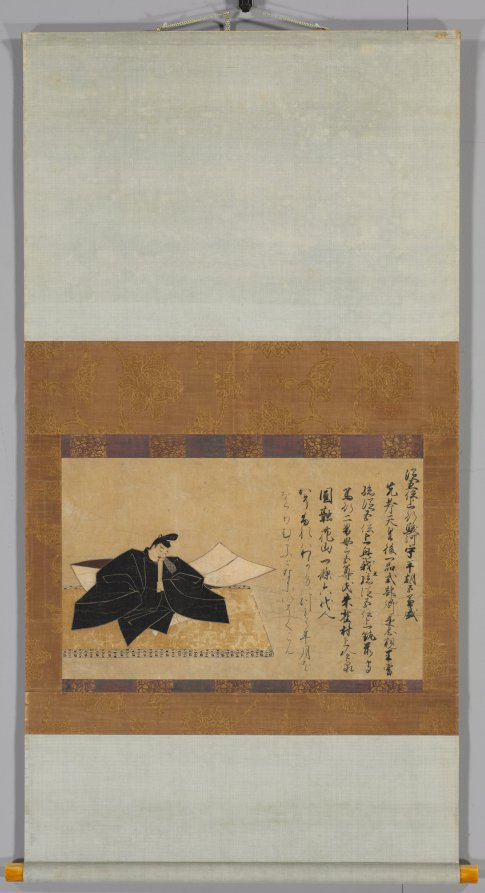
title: Taira no Kanemori of the Thirty-Six Poetic Immortals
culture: Japan, Kamakura period (1185–1333)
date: 1200s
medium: Section of a handscroll mounted as a hanging scroll; ink and color on paper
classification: Painting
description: Taira no Kanemori was one of the 36 poetic immortals of classical Japanese literature. This painting is a fragment of what was once a handscroll depicting all 36 poets.